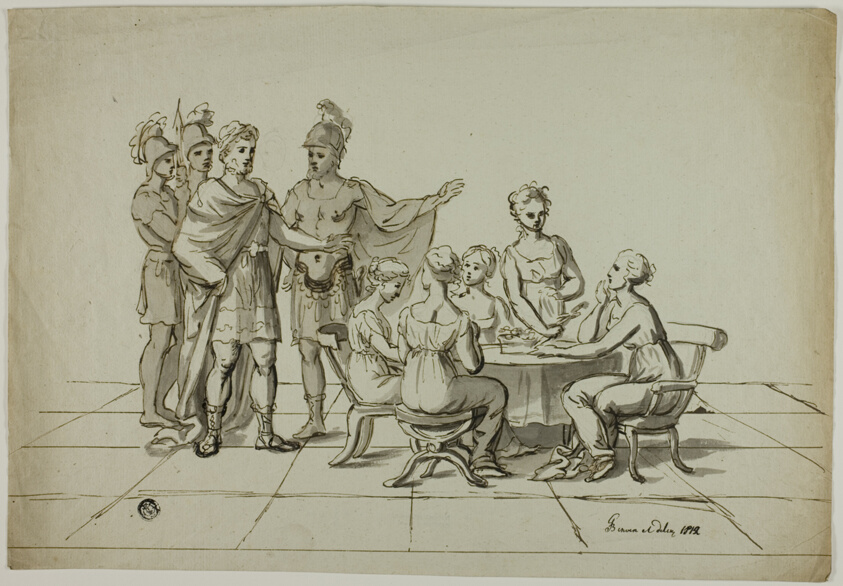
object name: Drawing and Watercolor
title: Roman Emperor Approaching Group of Women Seated at Table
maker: Unknown Artist; European, 18th century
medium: Pen and brown ink, with brush and gray wash, over graphite, on pale green laid paper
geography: Europe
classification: pen and ink drawings; drawings (visual works); prints and drawing